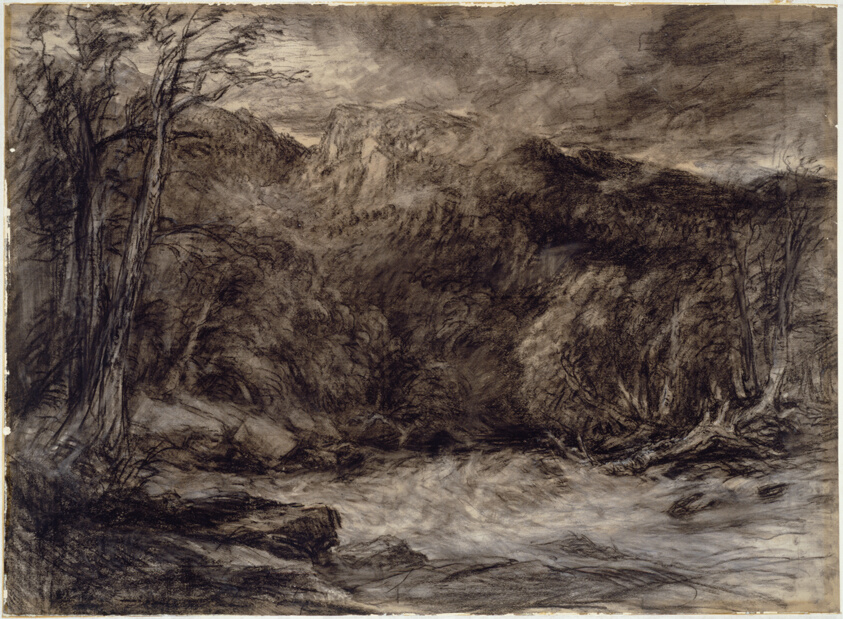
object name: Drawing and Watercolor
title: A Mountain Torrent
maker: David Cox the elder; English, 1783-1859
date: c. 1850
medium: Black and white chalk, and charcoal on cream wove paper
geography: England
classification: chalk; drawings (visual works); prints and drawing